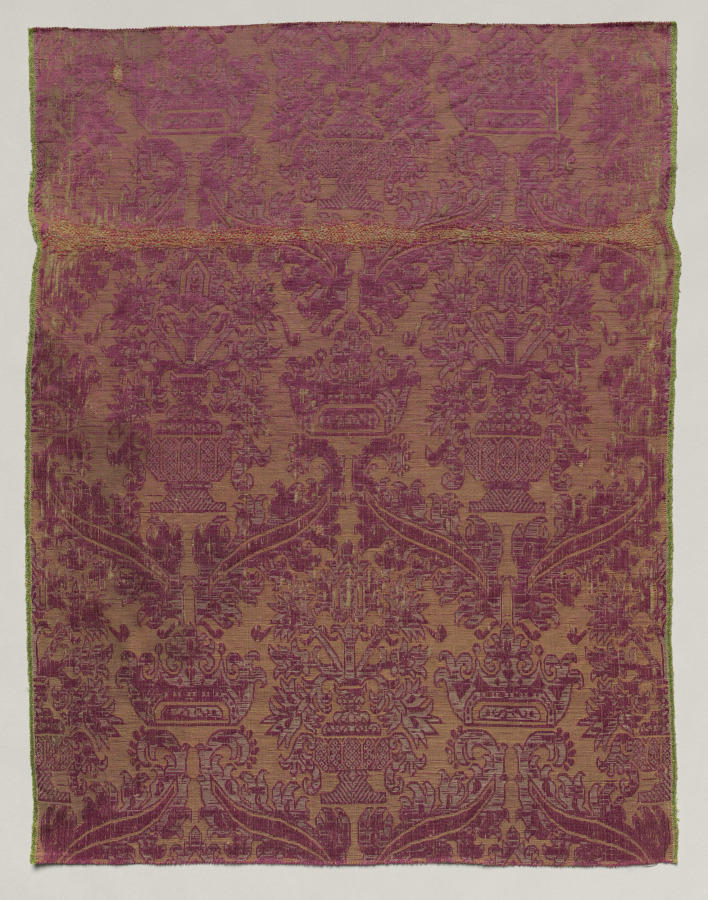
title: Silk and Hemp Fragment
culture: Spain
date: 1500s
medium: plain compound cloth (so-called brocatelle): silk and linen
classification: Textile